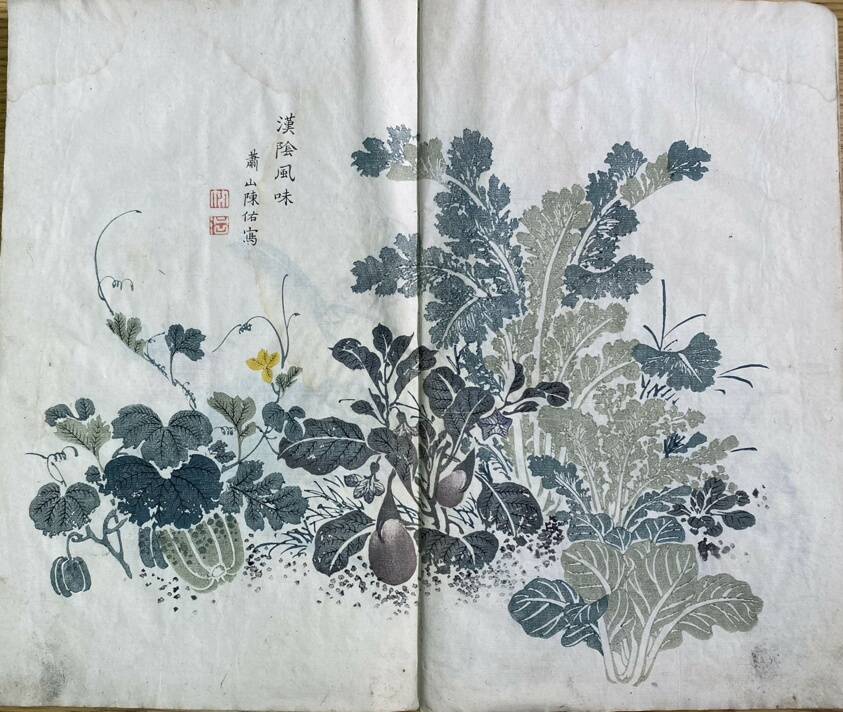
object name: Book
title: Yusai gafu (Yusai's picture album)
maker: Nakabayashi Chikuto (Japanese, 1776-1853)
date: 1831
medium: Woodblock- printed book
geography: Japan